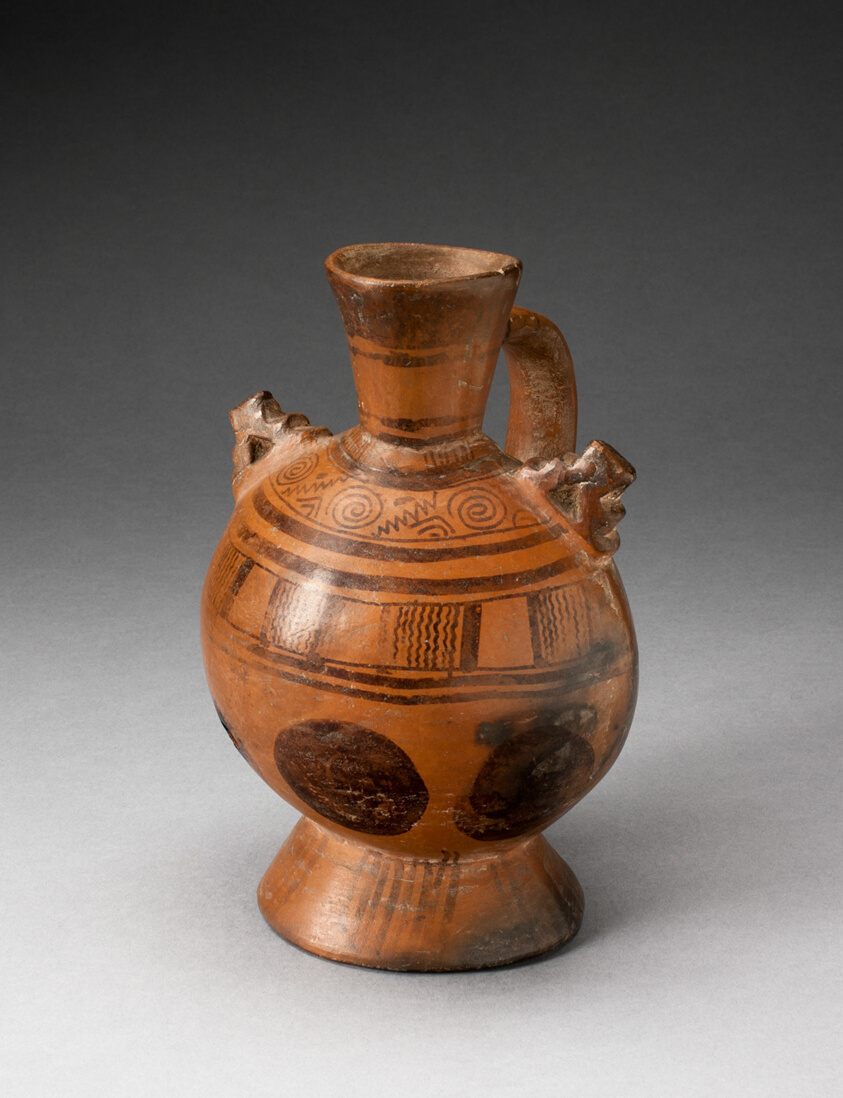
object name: Vessel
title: Single-Handled Pedestal Jar with Geometric Motifs and Appliques on Shoulders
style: lambayeque, late intermediate period, Pre-Columbian, americas, Arts of the Americas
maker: Lambayeque (North coast, Peru)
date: 1000–1470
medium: Ceramic and pigment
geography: Peruvian North Coast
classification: earthenware; ceramics; vessel; art of the americas